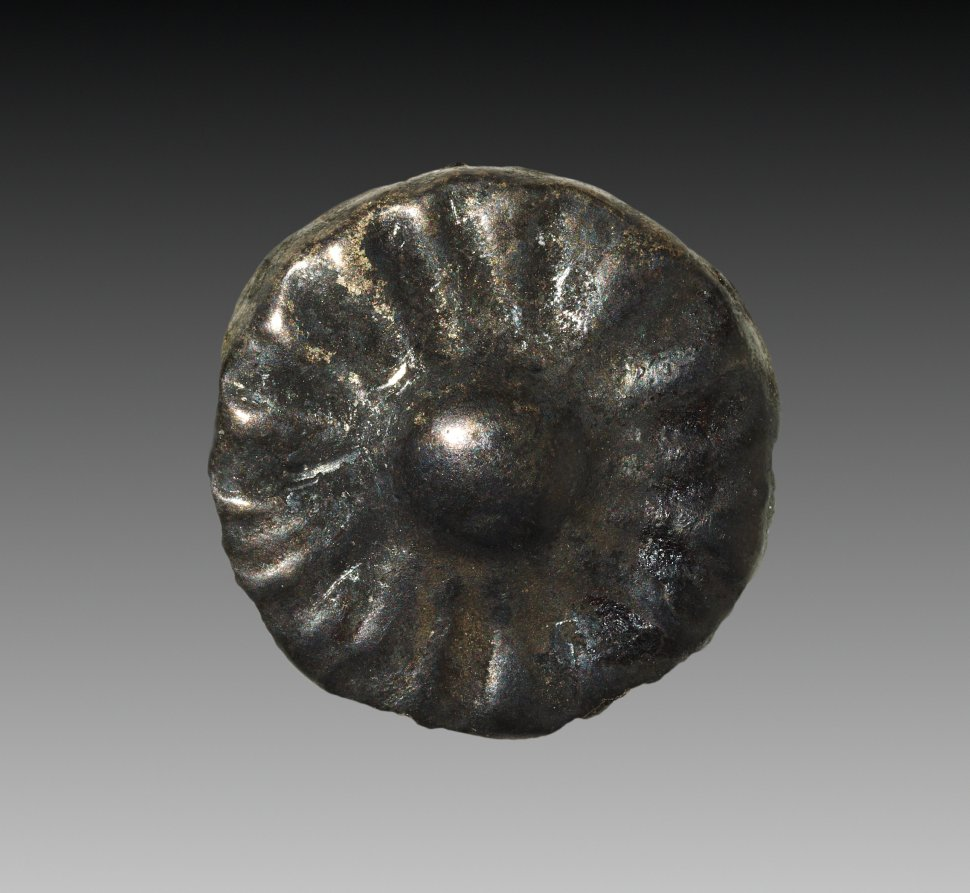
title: Rosettes for Wig Decoration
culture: Egypt, Middle Kingdom (2040–1648 BCE), Dynasty 12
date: 1980–1801 BCE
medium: silver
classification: Jewelry